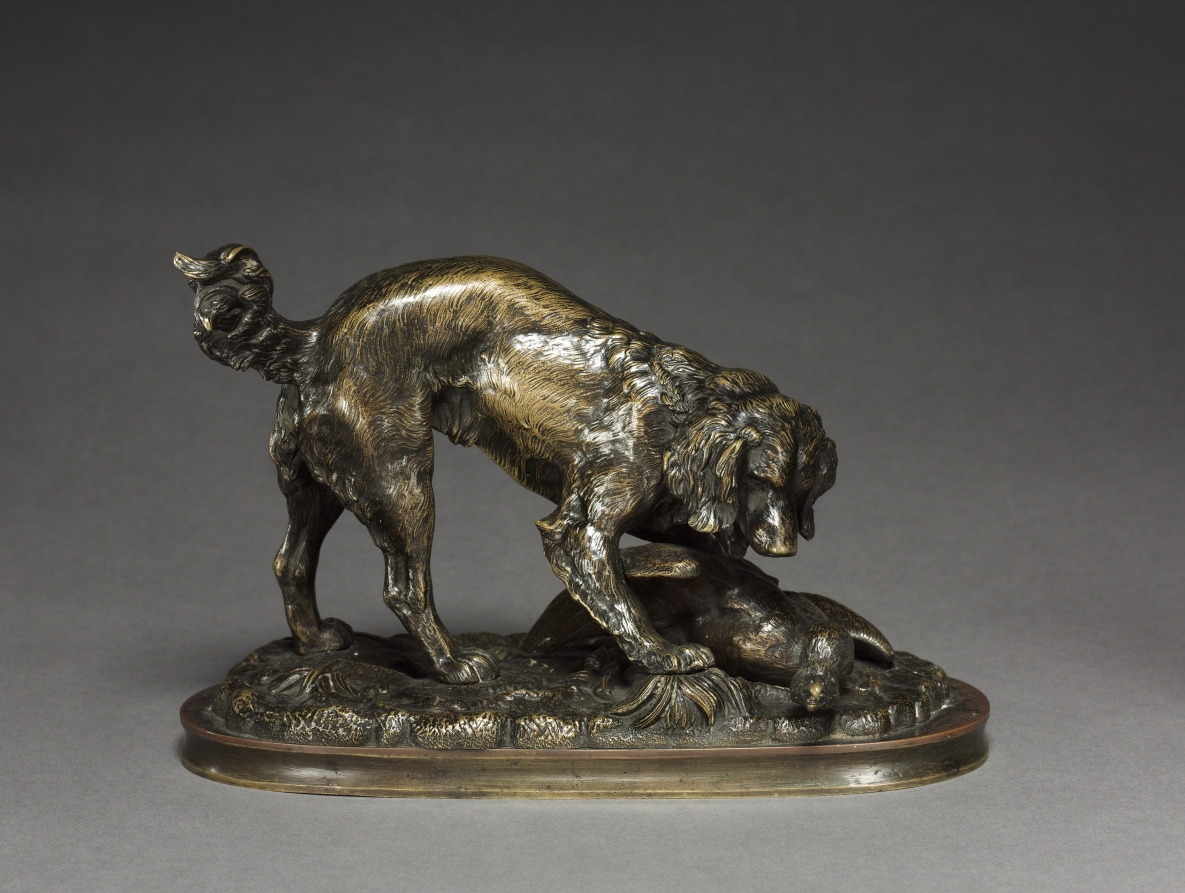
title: Spaniel and Duck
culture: France, 19th century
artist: Antoine-Louis Barye (French, 1796–1875)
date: c.1830 – 1875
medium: bronze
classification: Sculpture